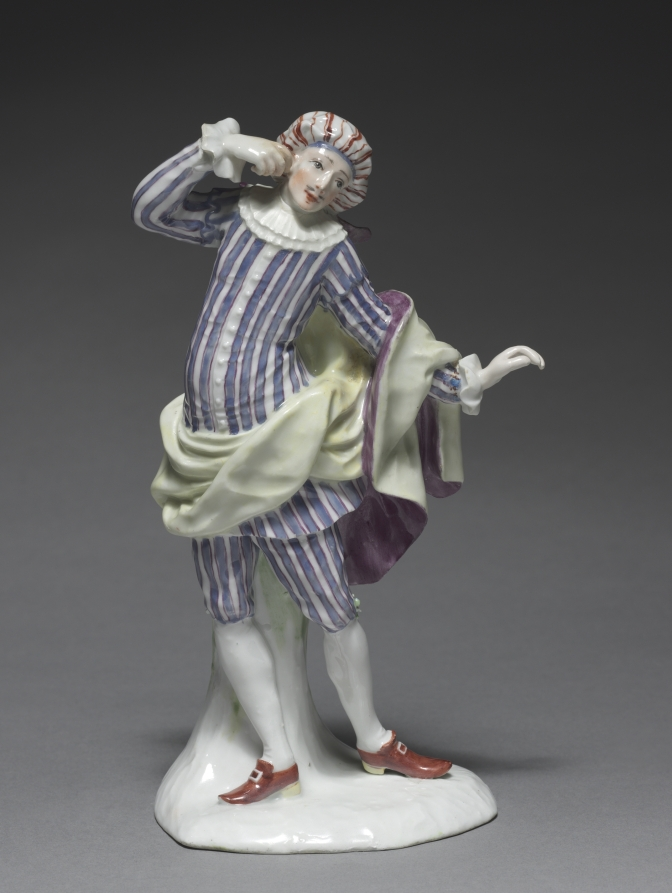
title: Italian Comedy Figure: Mezetin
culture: Germany, Brunswick, 18th century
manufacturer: Fürstenberg Porcelain Factory (German)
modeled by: Simon Feilner (German, 1798)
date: c. 1753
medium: porcelain with enamel decoration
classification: Ceramic